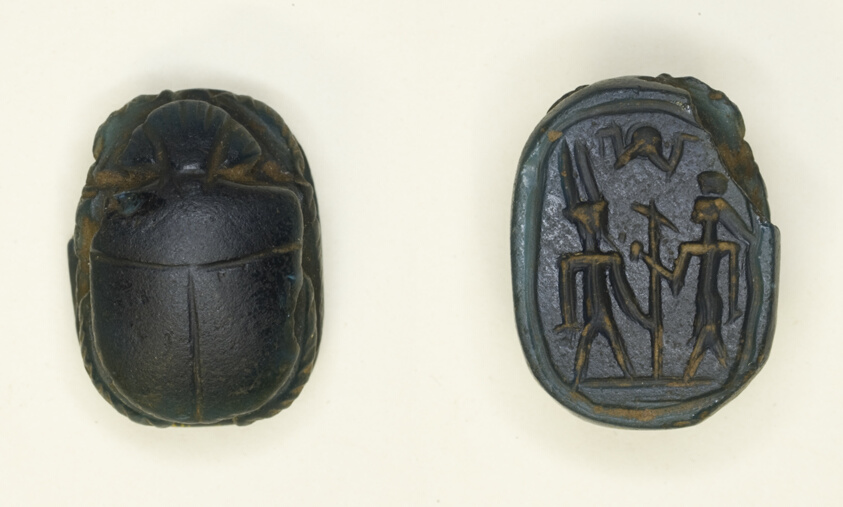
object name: Costume and Accessories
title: Scarab: Two Standing Deities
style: new kingdom, egyptian, ancient, eighteenth dynasty, nineteenth dynasty, twentieth dynasty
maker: Egyptian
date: New Kingdom, Dynasties 18–20 (about 1550–1069 BCE)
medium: Glass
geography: Egypt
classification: scarab; ancient art; costume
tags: deities, gods (deities), insects